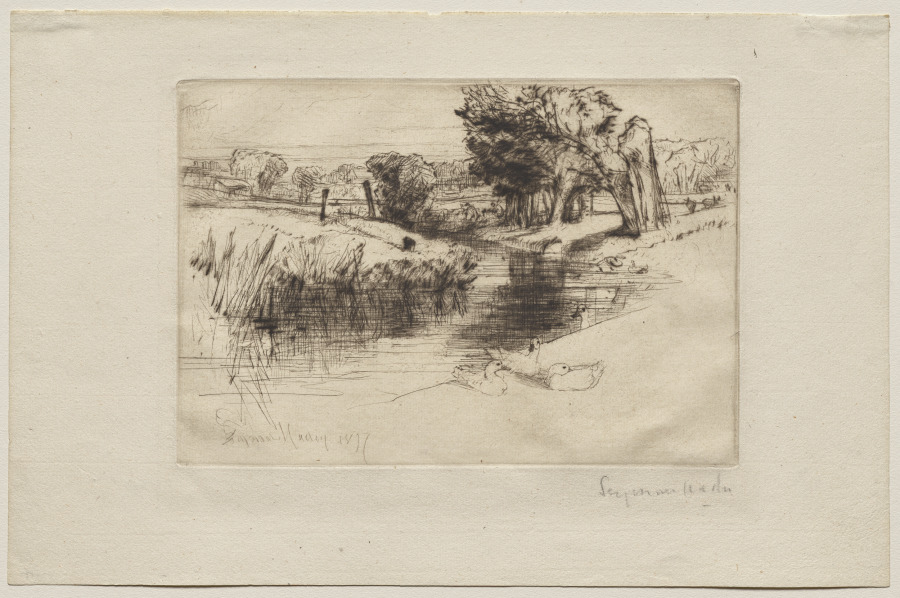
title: A Backwater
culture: England, 19th century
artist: Francis Seymour Haden (British, 1818–1910)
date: 1877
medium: etching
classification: Print